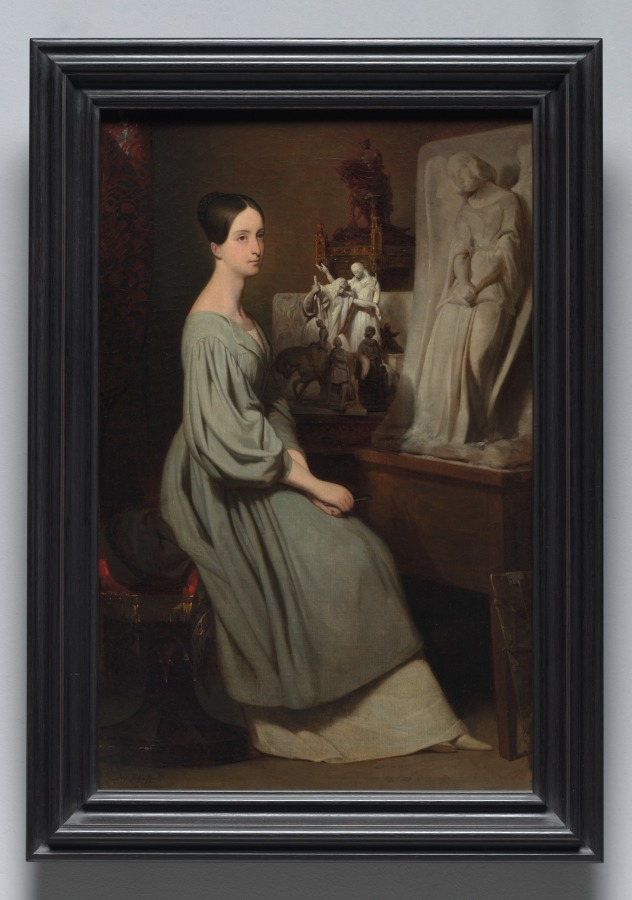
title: Princess Marie d'Orléans in Her Studio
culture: France, 19th century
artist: Ary Scheffer (Dutch, 1795–1858)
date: c. 1838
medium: oil on fabric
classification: Painting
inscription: Signed lower left: Ary Scheffer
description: Scheffer frequently portrayed his favorite pupil, the Princess Marie d'Orléans (1813-1839), daughter of King Louis Philippe and a prominent sculptor. As proof of her dedication and talent, she wears an artist's smock and holds a chisel. Seen nearby are several of her works, including her model of her most famous sculpture, a stoic depiction of Joan of Arc.